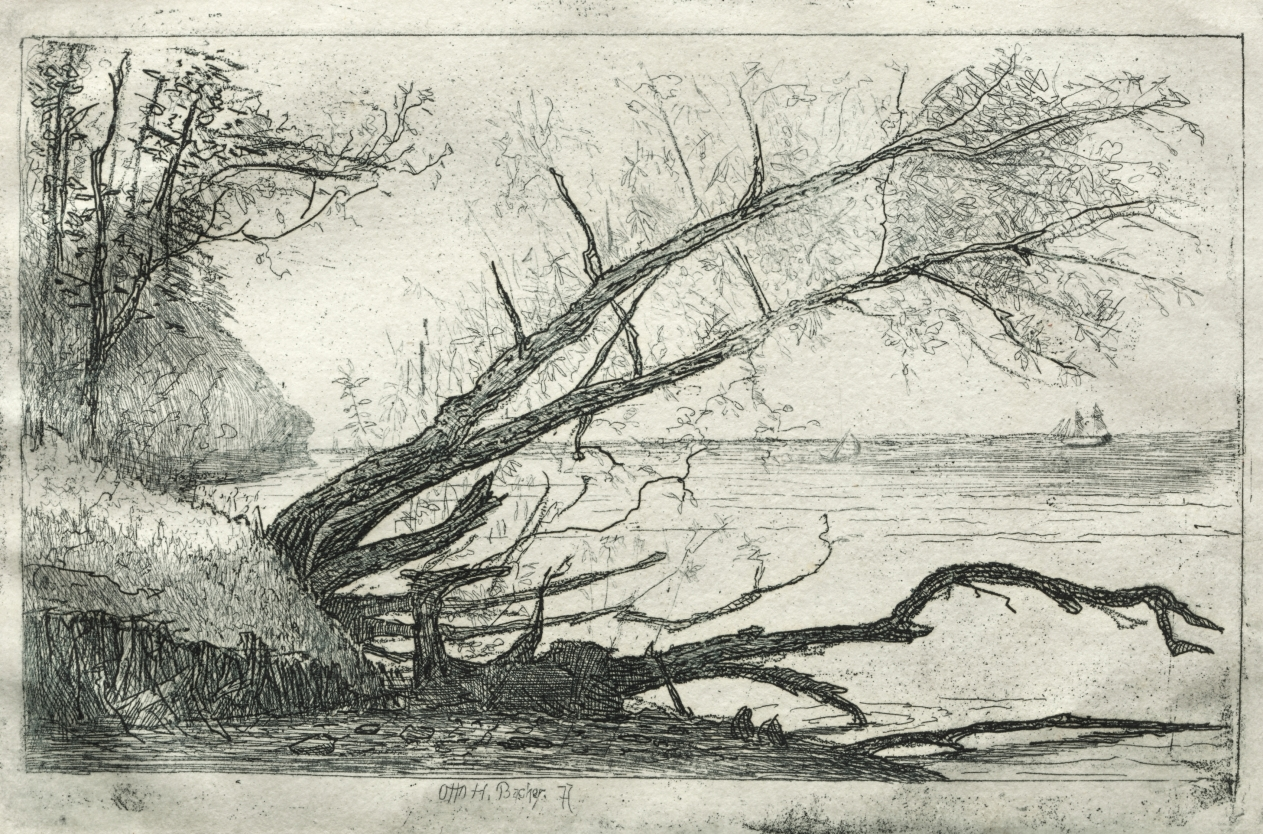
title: Old Sycamore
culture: America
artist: Otto H. Bacher (American, 1856–1909)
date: 1877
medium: etching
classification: Print